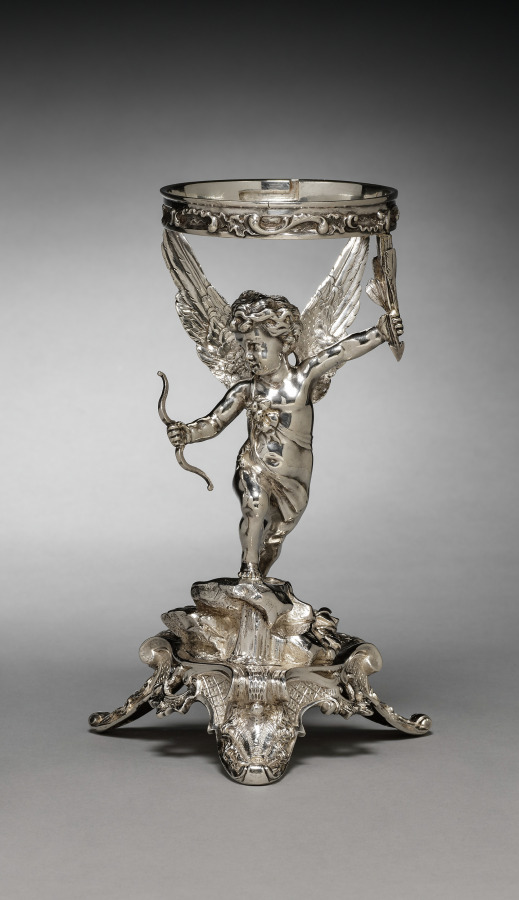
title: Stand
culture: Russian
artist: House of Fabergé (Russian, 1842–1918)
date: c. 1890–99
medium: silver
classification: Silver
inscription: Inscribed “K. Fabergé” in Cyrillic, surmounted by the double-headed Imperial eagle.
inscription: “88” silver standard